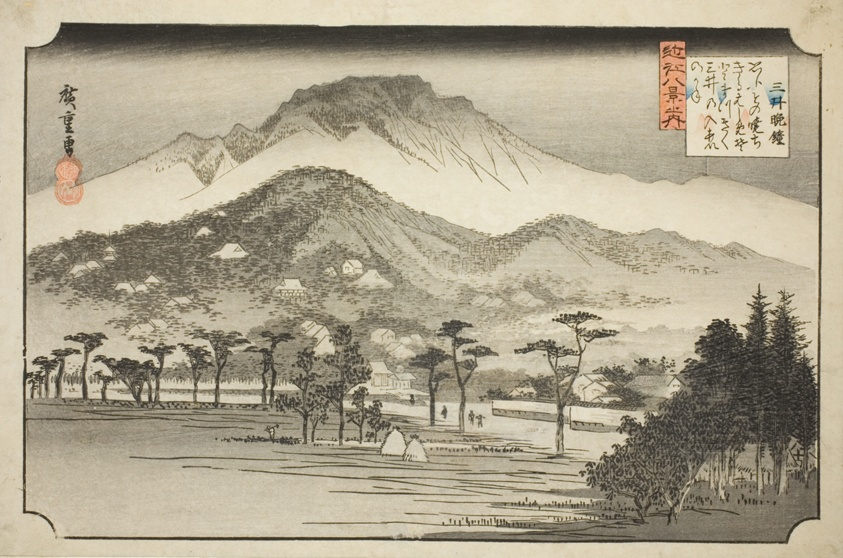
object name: Print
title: The Evening Bell at Miidera (Mii no banshō), from the series "Eight Views in Omi Province (Omi hakkei no uchi)"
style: Japanese (culture or style)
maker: Utagawa Hiroshige (Japanese, 1797-1858)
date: 1837–38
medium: Color woodblock print; ōban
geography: Japan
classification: woodblock print; print; asian art